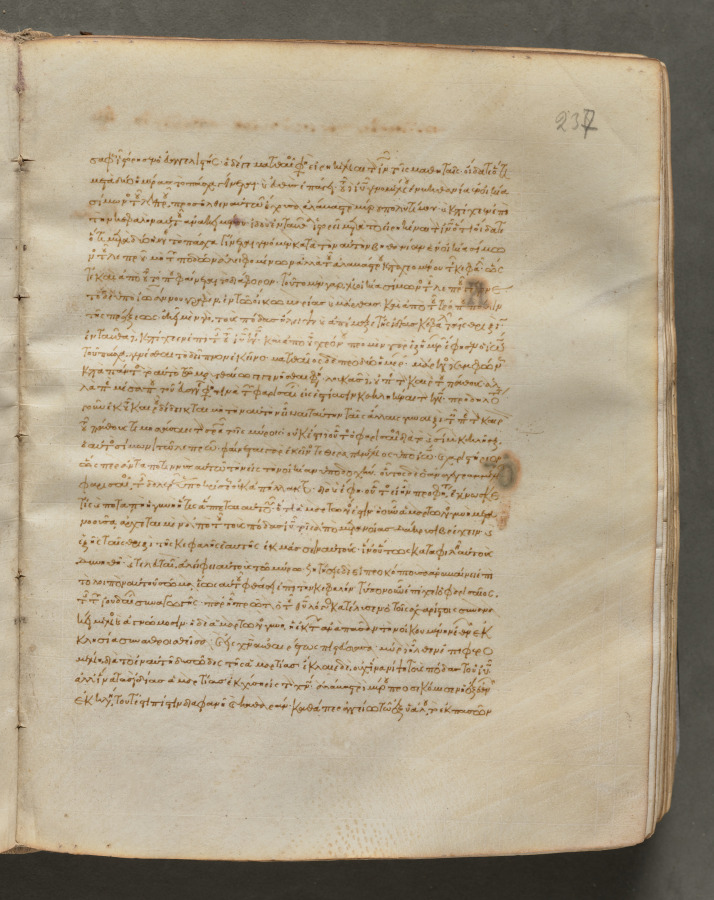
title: Text, folio 237 (recto), from a Gospel Book with Commentaries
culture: Byzantium, Constantinople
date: c. 1000–1100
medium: ink, tempera, and gold on vellum; leather binding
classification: Bound Volume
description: Each of the four gospels in this book opens on a page with brilliantly illuminated borders depicting the author of the text as well as birds—principally peacocks, symbols of the immortality of the soul—and fountains, representing the fountain of life and the salvation of the soul. This volume consists of 428 leaves with texts in Greek. Its level of sophistication suggests that it was probably written and decorated in a monastery in Constantinople.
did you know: Gospel books were carried in procession through Byzantine churches.